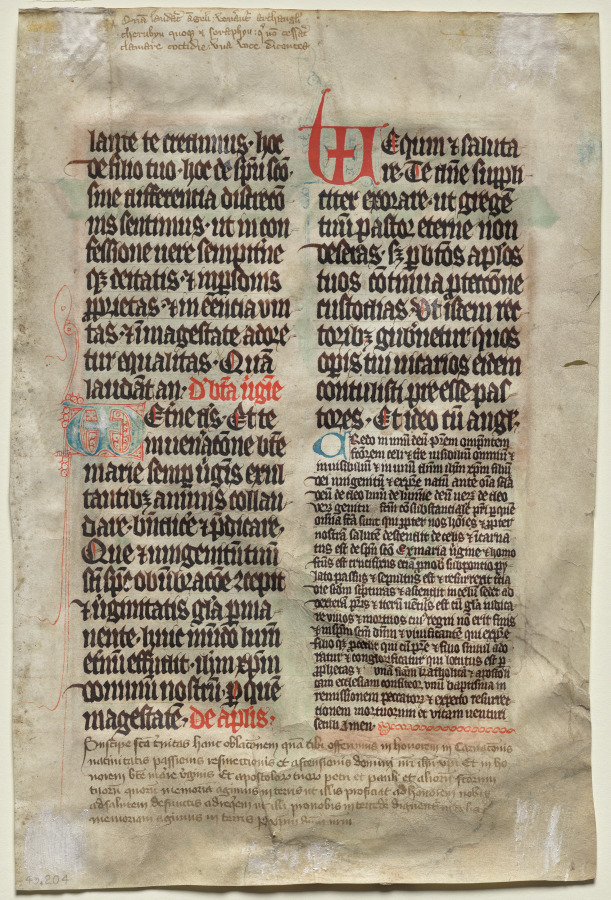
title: Leaf from a Missal: Text (verso)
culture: Bohemia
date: c. 1330–40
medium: ink, tempera, and gold leaf on parchment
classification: Manuscript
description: The crucified Christ was a central theme of medieval visual art. Each period set its own artistic and iconographic priorities, depending on the function and context of the works. For example, the dead Christ with his head bowed, the side wound dripping with blood, and the richly designed loincloth is characteristic of the 1300s. This miniature is localized to Bohemia (present-day Czech Republic and Slovakia), with its capital Prague as a leading art center of its time. The great plague, however, does not seem to have triggered a surge of innovation here.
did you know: Below the cross a small skull is visible, Golgotha the site of the crucifixion was often translated as "place of the skull."